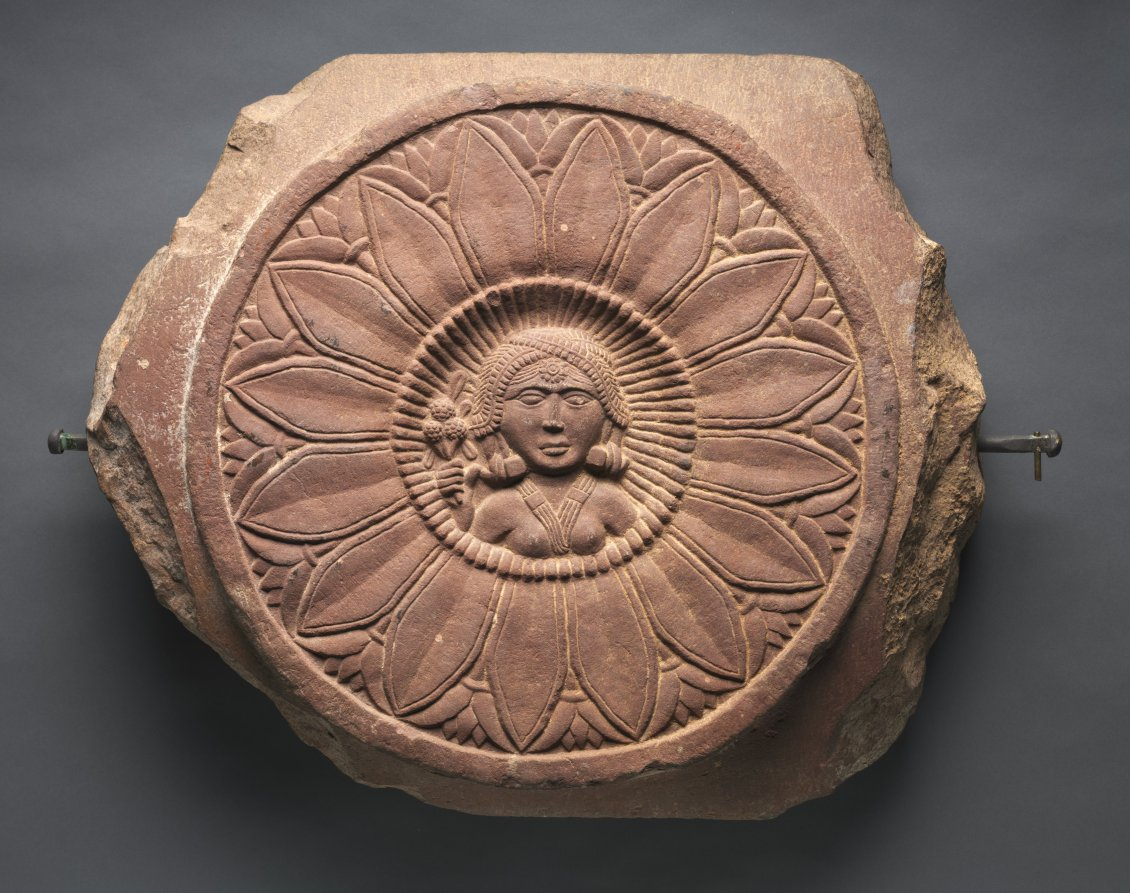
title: Double-Faced Crossbar from a Railing: Female Figure (verso)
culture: India, Madhya Pradesh, Bharhut, Shunga period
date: c. 150 BCE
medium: plum-colored sandstone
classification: Sculpture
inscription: Inscribed on recto: "Mitasa suchi danam"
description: The bust of a female figure in the center of the lotus medallion grasps a cluster of round flowers, probably kadamba, in her right hand. An embroidered coif crisscrosses over her head, and a lotus-shaped medallion ornaments her brow. Like a yakshi, or nature divinity, she embodies life-giving forces of nature.